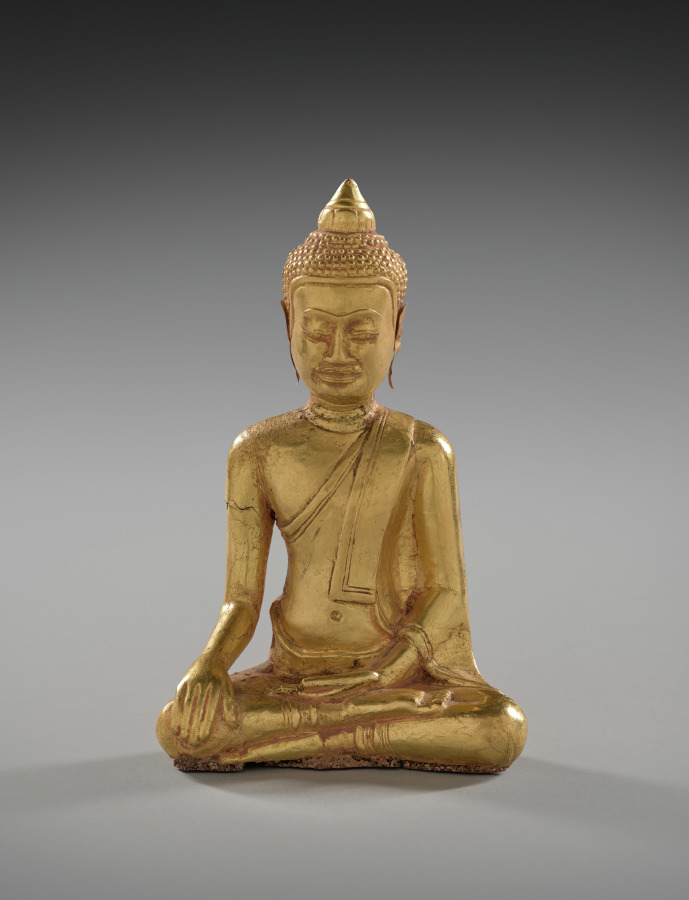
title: Seated Buddha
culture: Thailand, Ayutthaya, Wat Ratchaburana, 14th century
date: before 1424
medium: gold with resin core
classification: Sculpture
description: This pristinely modeled Buddha was fashioned from a sheet of 24-karat gold, using the repoussé (hammering) technique. The figure is filled inside with a resin core. The style is typical of the last phase of Khmer art (800s–1400s), the Lapburi style, which combines characteristics of both Cambodian and Thai sculptural styles.